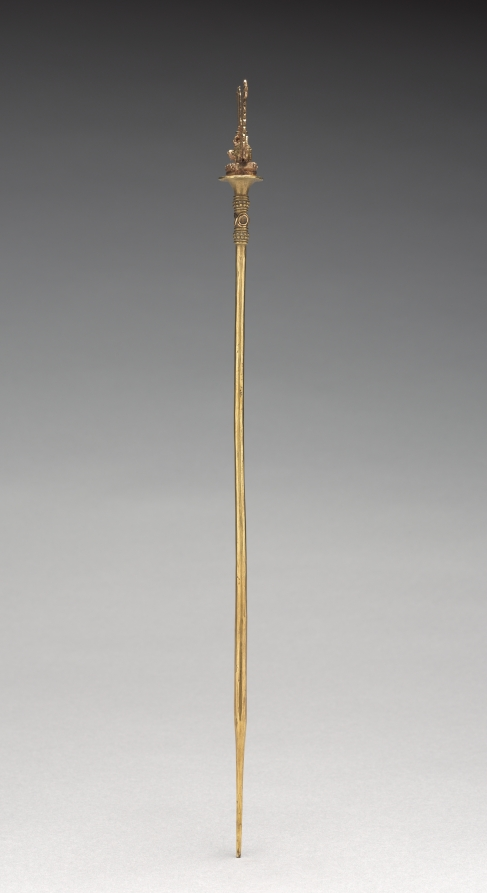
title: Lime Dipper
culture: Colombia, Calima region, Yotoco style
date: c. 1–800 CE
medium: gold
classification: Metalwork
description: Coca-leaf chewing was a widespread ritual in ancient South America. Utensils included a container and a dipper or spoon for powdered lime (made from seashells), added to the coca to enhance its gentle, stimulating effect. Colombian cultures are especially known for transforming these utensils into works of art made of precious metal. The image on the tallest dipper is wonderfully complex. A serpent coils at the bottom, beneath a snarling animal with a huge, vertical tail. This animal has a tiny monkey on its back; the monkey also has a huge tail, which rests on the first animal's head like a headdress. This intricate image was created with the lost-wax casting process.